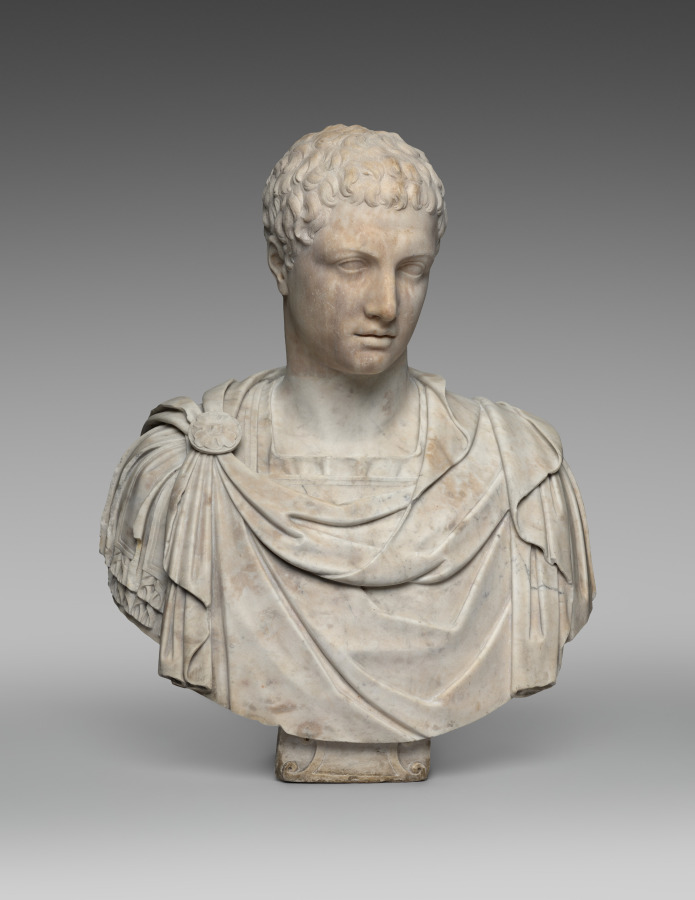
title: Bust of a Roman General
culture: Italy, 16th century or later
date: 1500s or later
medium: marble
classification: Sculpture